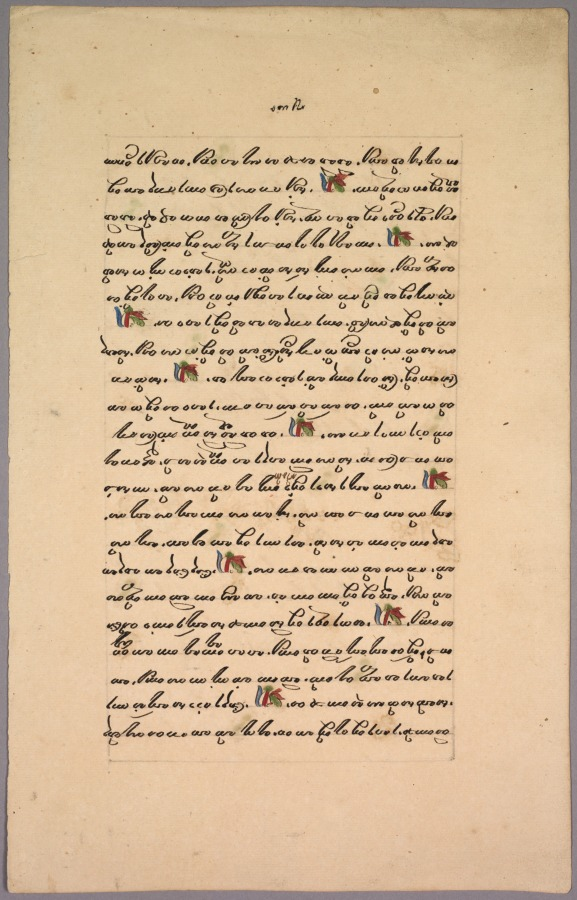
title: Page from Ramayana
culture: Java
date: 1800s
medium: ink on paper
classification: Manuscript